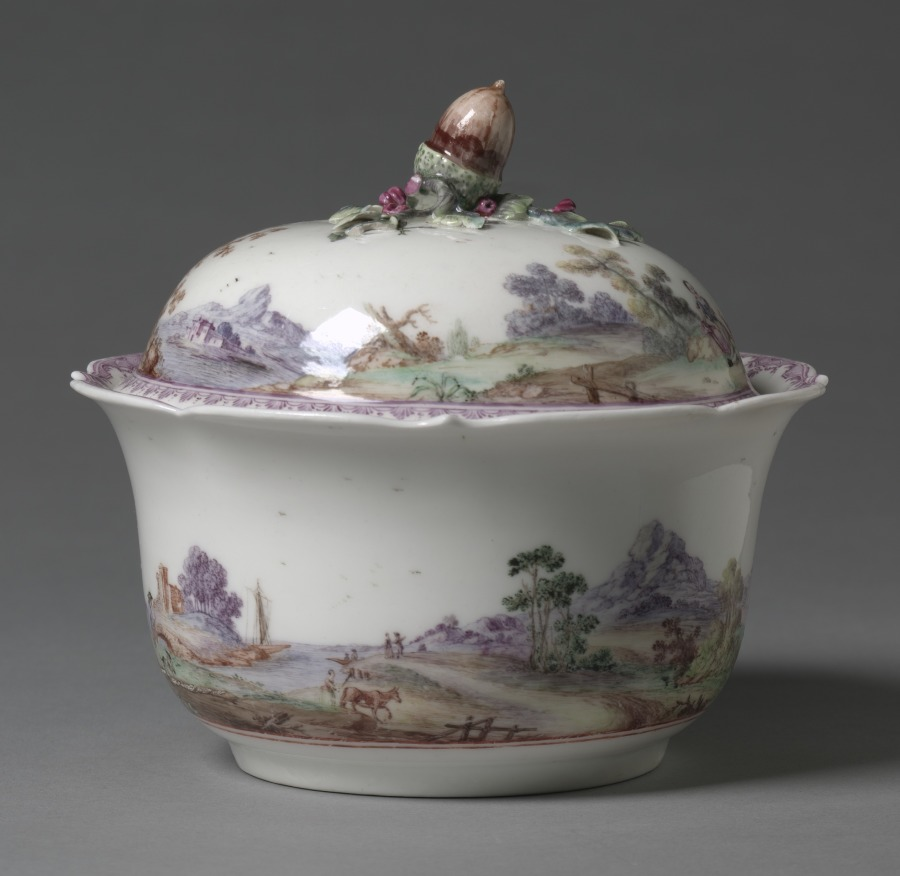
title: Covered Sugar Bowl (Pot à sucre)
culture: France, Vincennes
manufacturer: Vincennes Porcelain Manufactory (French, 1740–1756)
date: 1745–48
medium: soft-paste porcelain with enamel decoration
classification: Ceramic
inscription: In red on bottom of bowl: P.M. In red on interior of lid: P.M. 16 4.8B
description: This covered bowl, likely intended for sugar, is one of the earliest surviving examples of Vincennes porcelain, a reputed French factory moved to Sèvres in 1756. The continuous landscape is painted on this object en pointillé, a method by which a painter forms images with tiny dots. This style may have been influenced by their German competitors at the Meissen Porcelain Factory.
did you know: Three separate shades of purple, one of the most expensive colors to produce on porcelain during this time, are used extensively in this object’s paintings.